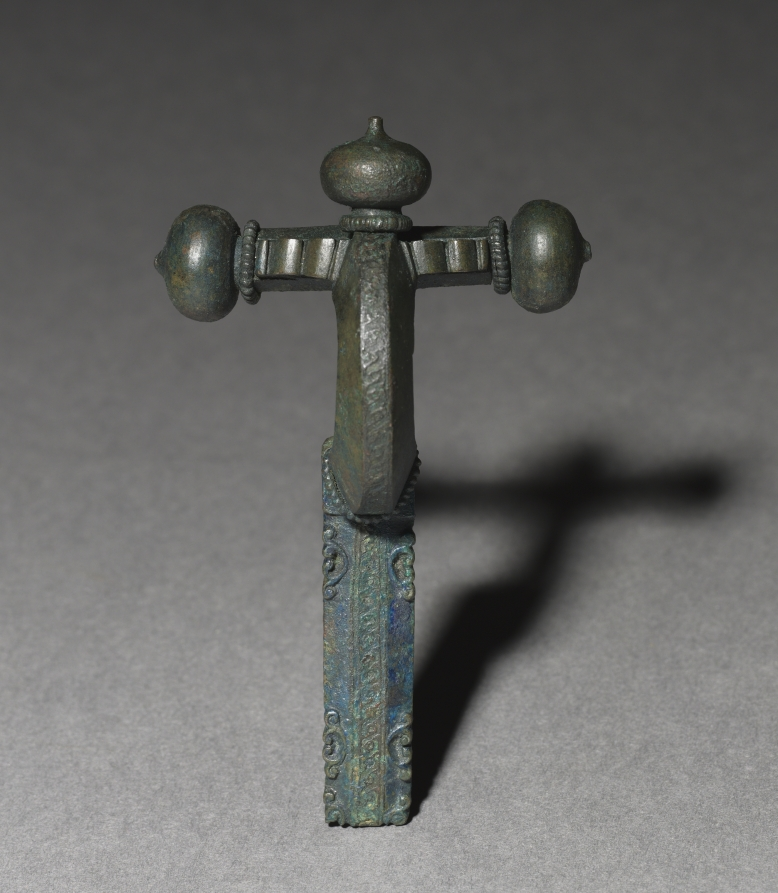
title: Crossbow Fibula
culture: Gallo-Roman or Romano-British, Migration period, 4th century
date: c. 350–400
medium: bronze, gilt-bronze, silver, and niello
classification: Jewelry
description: A fibula was a garment clasp that functioned somewhat like a modern safety pin. Since buttons were not used in antiquity, fibulae were used to keep a cloak closed. They were worn by both men and women, commonly on the right shoulder, and produced in various sizes and shapes. Because they were highly visible accessories, they often received decorative gilding, inlay decoration, or "onion"- shaped domes. Crossbow fibulae were introduced by the Romans and are named for their resemblance to the weapon. Decorative and technical features of this group suggest they may have been made in Roman-occupied Britain.